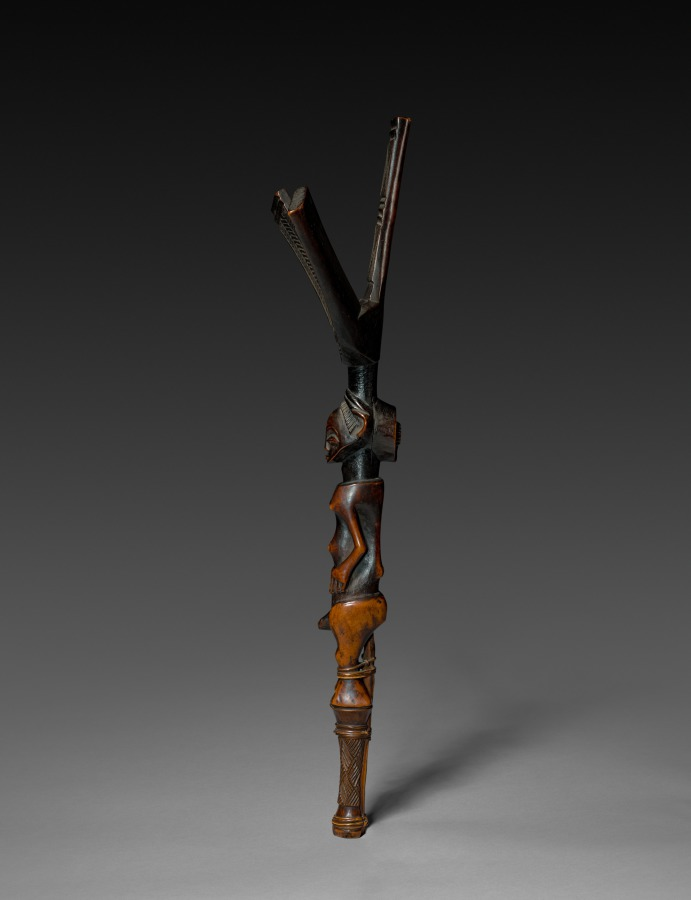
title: Bow Stand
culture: Africa, Central Africa, Democratic Republic of Congo, Luba-style carver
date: 1800s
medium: Wood and plant fiber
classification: Sculpture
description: A powerful symbol of the Luba king, bow stands were ceremonial objects that resided within the king’s private vicinity in the palace and were never displayed in public. Typically, bow stands depict a female figure, but the sculptor has carved a figure with ambiguously gendered human traits. This is a symbolic depiction that may allude to how divine rulers (mulopwe) were believed to have both “male” and “female” character traits, which allowed this sculpture to act as a vessel for spirits of any gender.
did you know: The shape of this wooden bow stand is based on a more practical version in metal used by hunters.